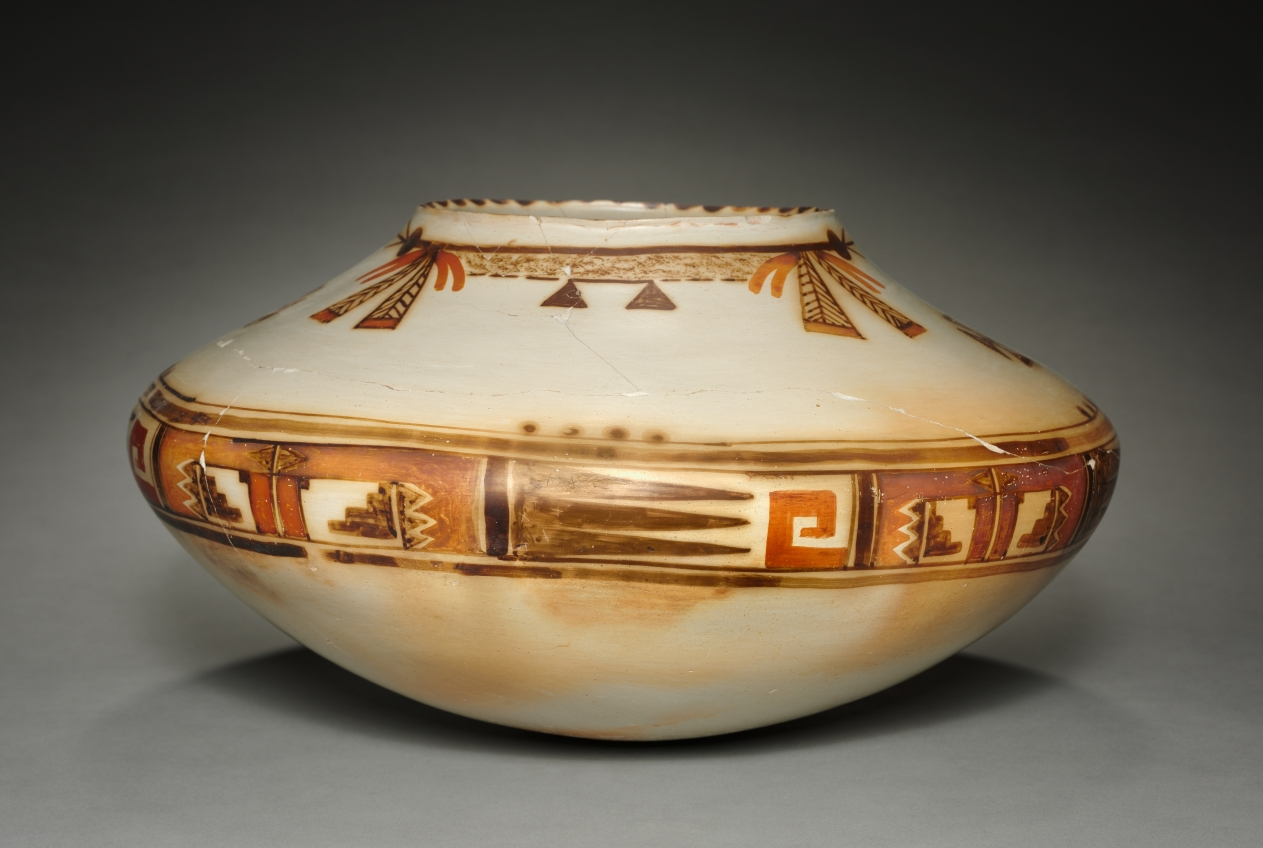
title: Jar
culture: Native North America, Southwest, Ancestral Pueblo, Sikyatki style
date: 1400–1600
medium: Ceramic, slip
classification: Ceramic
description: Ancient Sikyatki ceramics are noted for their large, distinctive shapes, meticulously stone-polished surfaces, thin walls that “ring” when tapped, and wide variety of reds and oranges, a contrast to earlier preferences for black and white. These artistically and technically inventive vessels are ancestral to modern Hopi ceramics, having developed in the area where Hopi communities live today. The Hopi regard a mottled orange color as a sign that the pot emerged from firing with life and spirit; the vessel’s “voice” is a bell-like tone that tapping produces. Such concepts likely have roots in the ancient past.